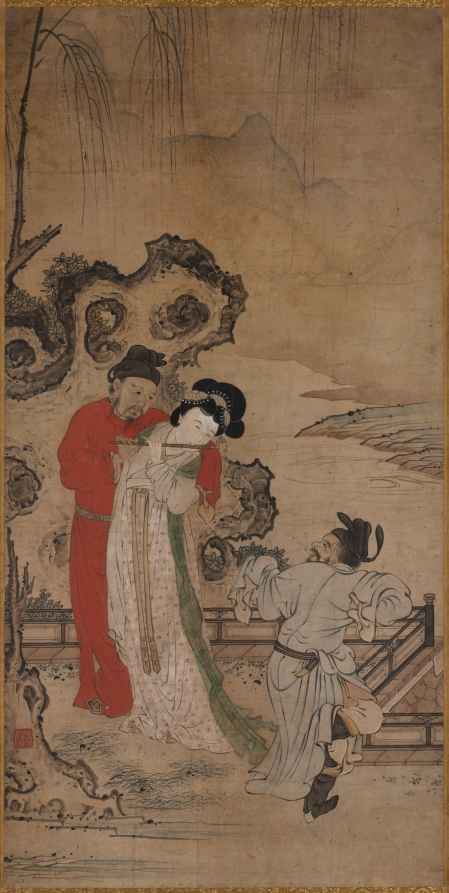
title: Emperor Minghuang Teaching Yang Gueifei to Play the Flute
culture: Japan, Muromachi period (1392–1573)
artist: Choryusai (Japanese)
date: late 1400s–early 1500s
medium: hanging scroll; ink and color on paper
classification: Painting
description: Minghuang, a prominent emperor of Tang (618-906) China and his consort, Yang Gueifei, have inspired many legends, paintings, and poetry in later Chinese culture. Through the study of Chinese literature and the collecting of Chinese paintings, tales of their lives and romance became well-known in Muromachi Japan.